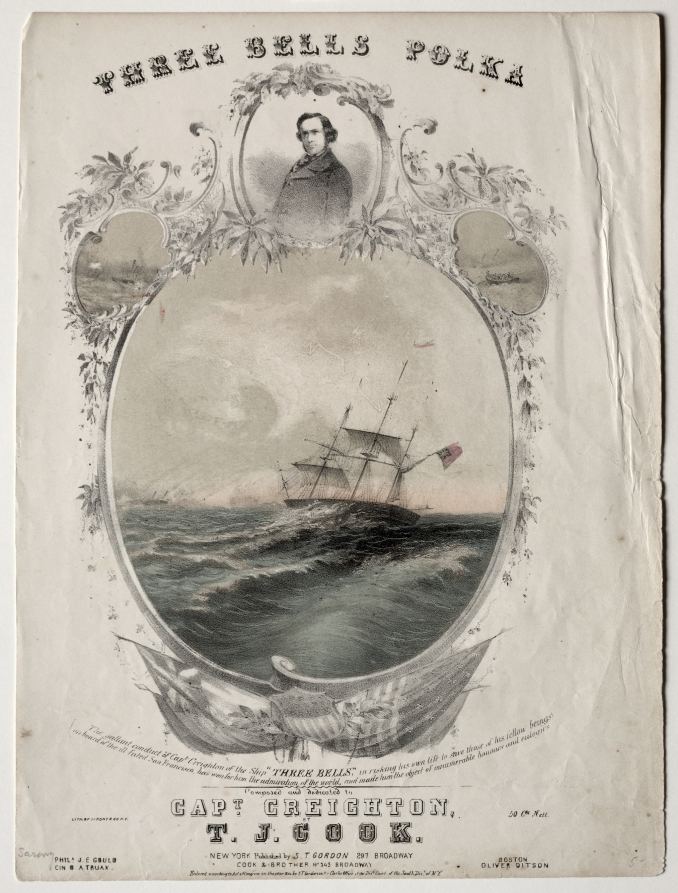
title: Three Bells Polka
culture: America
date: 1854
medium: lithograph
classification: Print